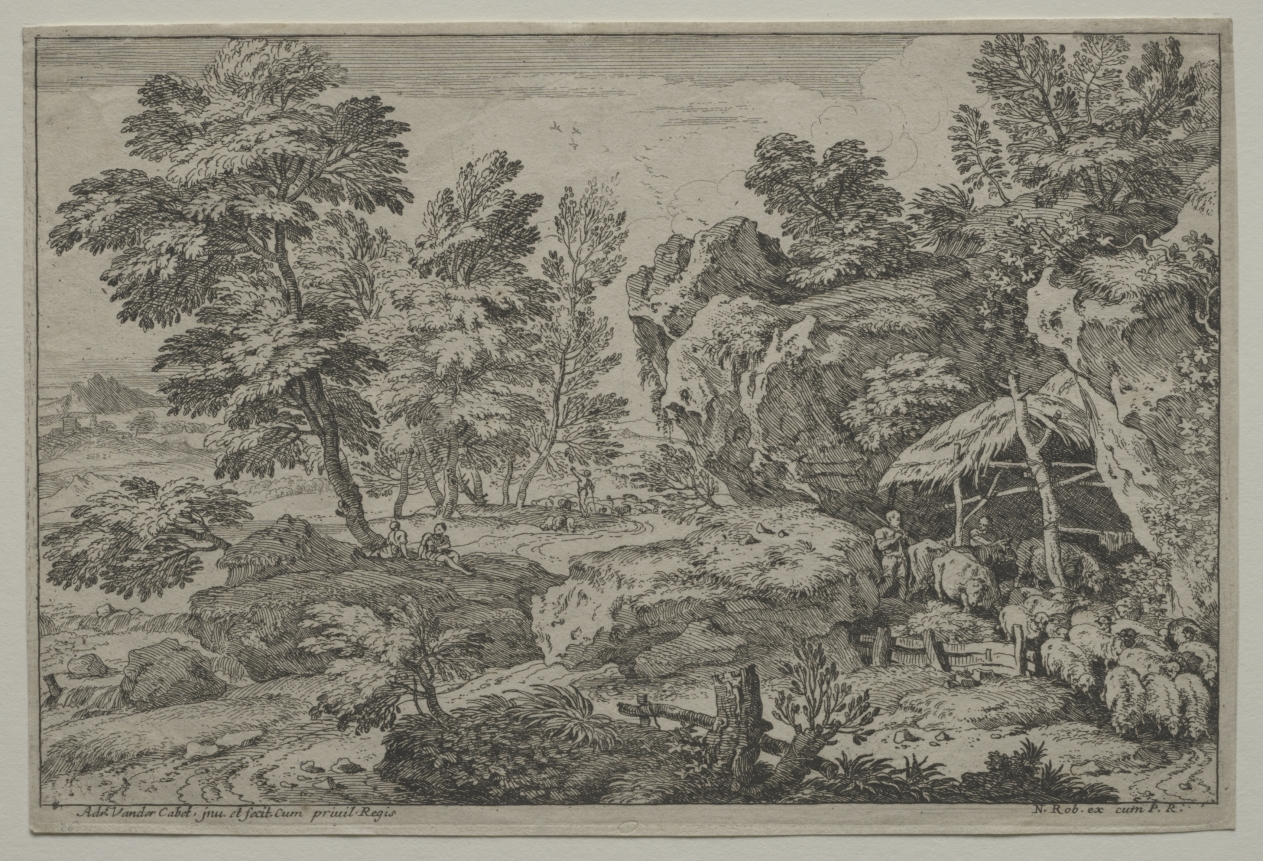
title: Landscape with Shepherds and two Flocks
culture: Netherlands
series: Various Landscapes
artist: Adrian van der Cabel (Dutch, 1631–1705)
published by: Nicolas Robert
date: second half 1600s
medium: etching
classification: Print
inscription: lower left, in plate: Adr. Vander Cabel. inv. et fecit. Cum privil. Regis ; lower right, in plate: N. Rob. ex cum P. R. ; lower right, in graphite: 26 ; VERSO, upper left, in graphite: 26. 2 de ; lower center, in graphite: 26. 2 de ; lower right, pen and gray ink: 6